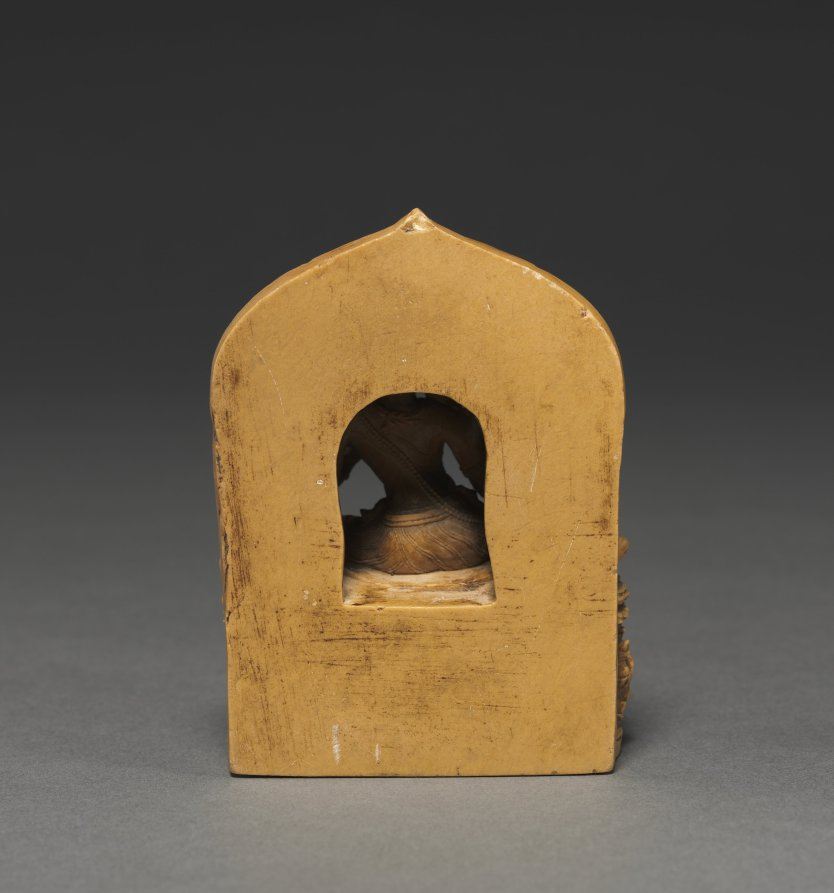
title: Bodhisattva of Compassion as Lokeshvara the Sky Flyer (Khasarpana)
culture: Eastern India, Bihar, Pala dynasty, reign of Ramapala (reign 1078/79–at least 1130)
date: late 1000s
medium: Kaolin with traces of pigment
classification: Sculpture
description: Exquisite Buddhist votive sculptures carved from soft ivorylike stone were made for personal devotional use during the 11th and 12th centuries in particular. This form of Avalokiteshvara, the powerful bodhisattva of compassion, sits with one foot down in the posture of royal ease, the Buddha Amitabha in his crown. This special form of the bodhisattva of compassion brings relief to hungry ghosts. A hungry ghost with a distended belly praises him in the lower left corner of this plaque, to the left of the tiny regal figure with a manuscript tucked in his left arm. Green Tara is at Avalokiteshvara's proper right, holding a lotus, and the four-armed goddess Bhrikuti holds a rosary and water bottle at his left.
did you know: When colored, Lokeshvara was white, Tara at his right knee was green, and Bhrikuti at his left knee was gold.